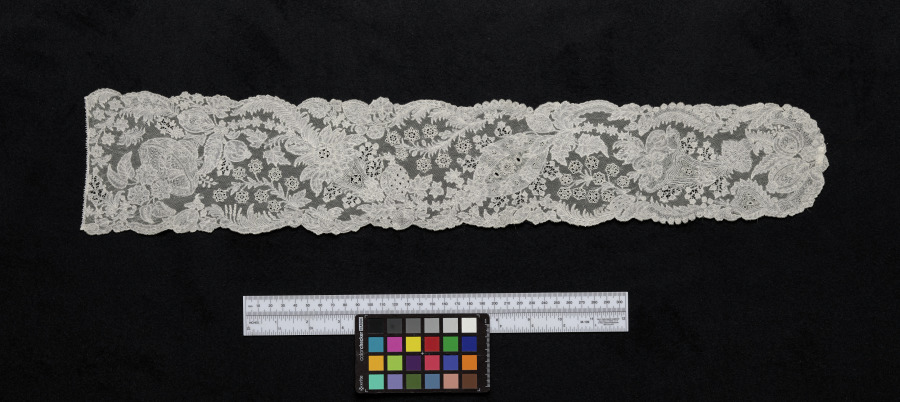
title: Lace Lappet (one of a pair)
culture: Belgium, Brussels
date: 1730s–40s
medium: noncontinuous bobbin lace (Point d'Angleterre) (double-stitched ground) with added needle lace; linen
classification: Lace